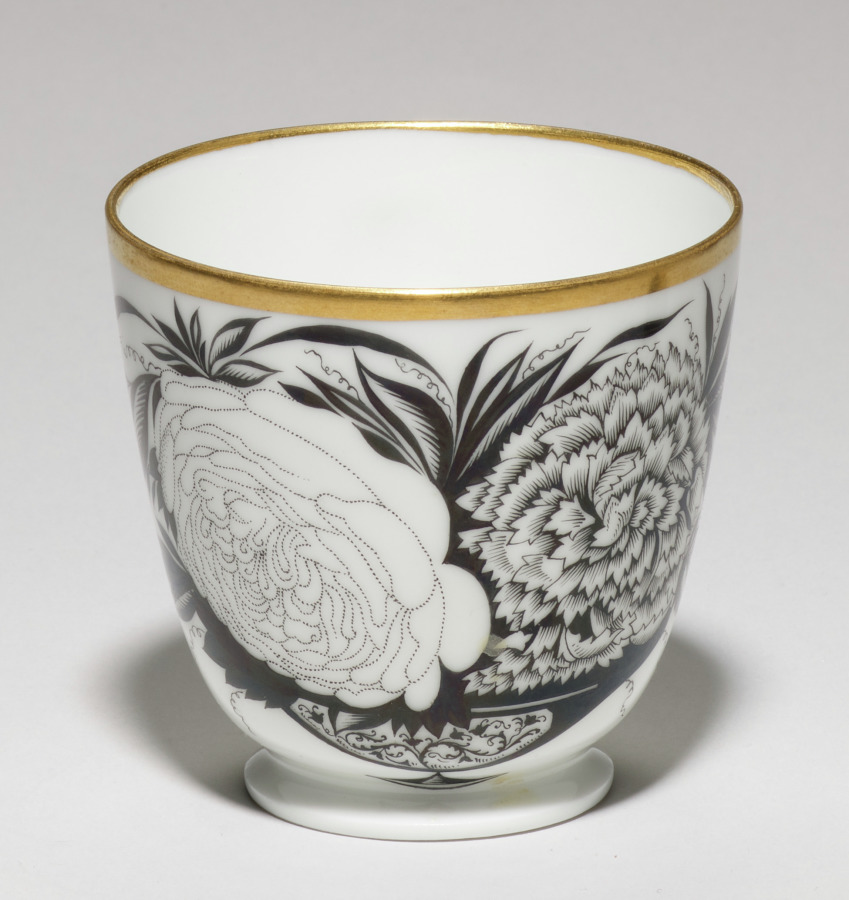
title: Cup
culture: Russia, St. Petersburg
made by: St. Petersburg Imperial Porcelain Factory (Russian)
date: 1881–1917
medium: porcelain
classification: Ceramic